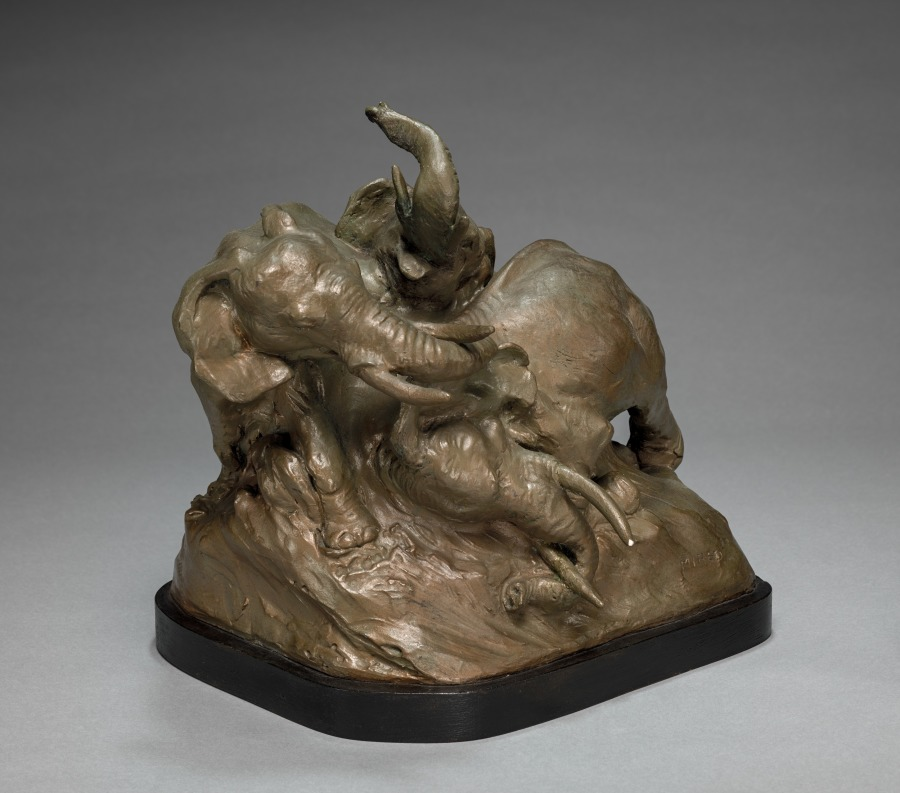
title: Mired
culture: America, Ohio, Cleveland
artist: John Ross Stewart (American, 1872–1954)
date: 1920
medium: plaster painted to resemble patinated green bronze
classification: Sculpture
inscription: incised in plaster near base: "Mired" and "JRS."